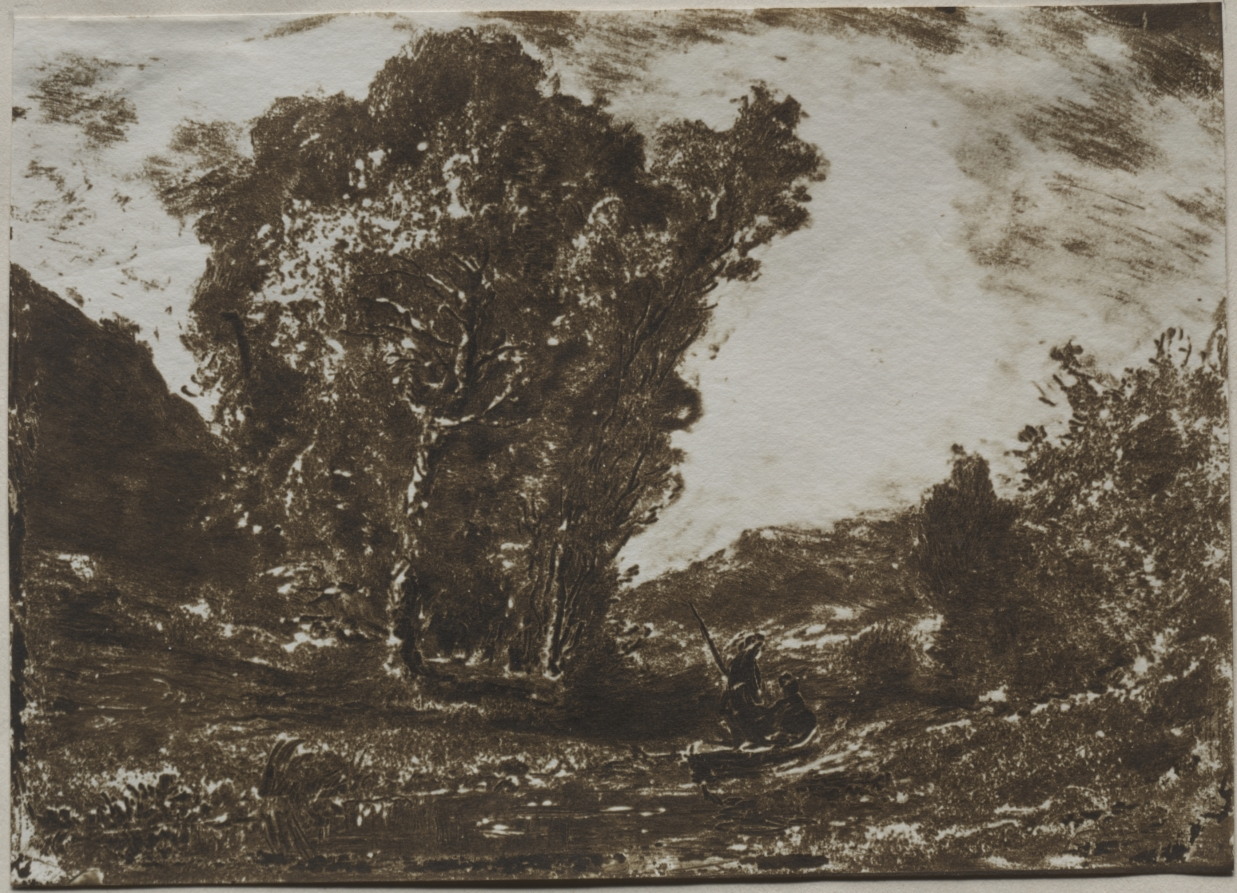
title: Two Boatmen in a Marsh near a Cluster of Trees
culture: France, 19th century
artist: Henri-Joseph-Constant Dutilleux (French, 1807–1865)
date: c. 1857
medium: cliché-verre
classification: Print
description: Unlike most cliché-verres, which are similar to line drawings, Dutilleux's thirteen works in this medium are extremely tonal. The artist described them as "monochrome paintings on glass for photography." Instead of scratching the design into the opaque ground covering the glass plate, as Corot or Daubigny had done, Dutilleux created the image by painting the plate with it.